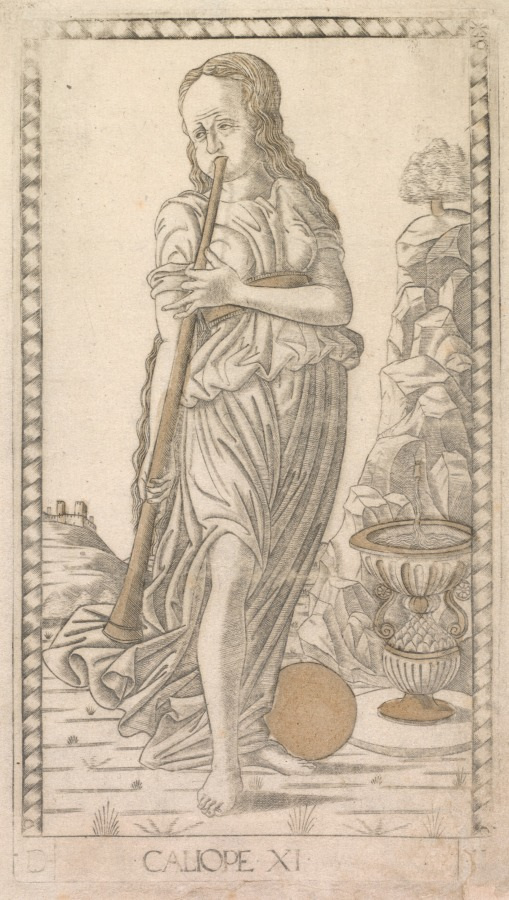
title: Calliope (from the Tarocchi series D: Apollo and the Muses, #11)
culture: Italy, Ferrara, 15th century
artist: Master of the E-Series Tarocchi (Italian, active 1460s)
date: before 1467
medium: engraving hand-colored with gold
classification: Print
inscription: Lettered below the image of Caliope (Calliope): ·D· / ·CALIOPE·XI· / [11]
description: This engraving is part of the Tarocchi group marked with the letter “D,” and named Apollo and the Muses. In Greek mythology, the nine Muses (Calliope, Urania, Terpsichore, Erato, Polyhymnia, Thalia, Melpomene, Euterpe, and Clio) were the daughters of Zeus, king of the gods, and Mnemosyne, the Titaness of memory. The Muses were goddesses presiding over different branches of the arts and sciences. Their leader and supervisor was Apollo, the god of light, music, prophecy, and poetry. Here, Caliope (Calliope) is personified as a full-length female figure, playing a long horn. Next to her is a fountain. This symbolizes the Greek Castalian font at Mount Parnassus, sacred to the Muses and believed by poets to be a source of inspiration. Calliope was regarded as the foremost of the Muses and the one prompting epic poetry.